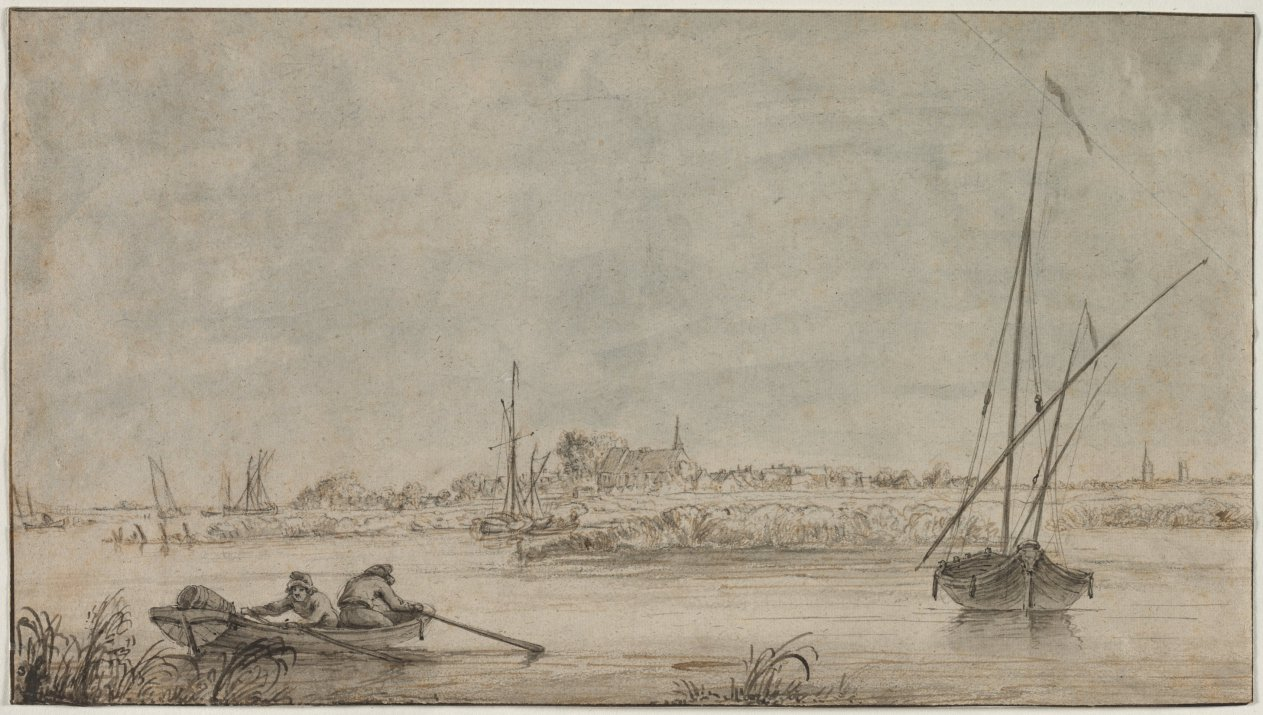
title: View of Dordrecht from the River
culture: Netherlands, last quarter 18th or first quarter 19th century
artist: Jacob van Strij (Dutch, 1756–1815)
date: 1775–1815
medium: pen and black and brown ink and brush and black, gray, brown and blue wash, over black chalk; framing lines in brown ink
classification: Drawing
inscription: VERSO, lower left, in graphite: N° 4 A Cuyp